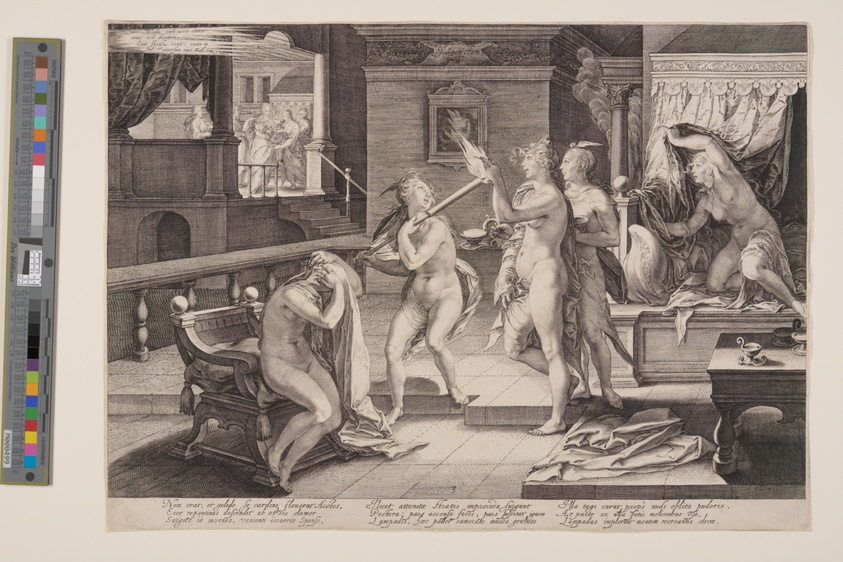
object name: Print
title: Virgins Receiving their Lamps, from Parable of the Wise and Foolish Virgins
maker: Jan Saenredam (Dutch, 1565–1607)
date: 1606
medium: Engraving on ivory laid paper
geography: Netherlands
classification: engraving; paper; print; prints and drawing